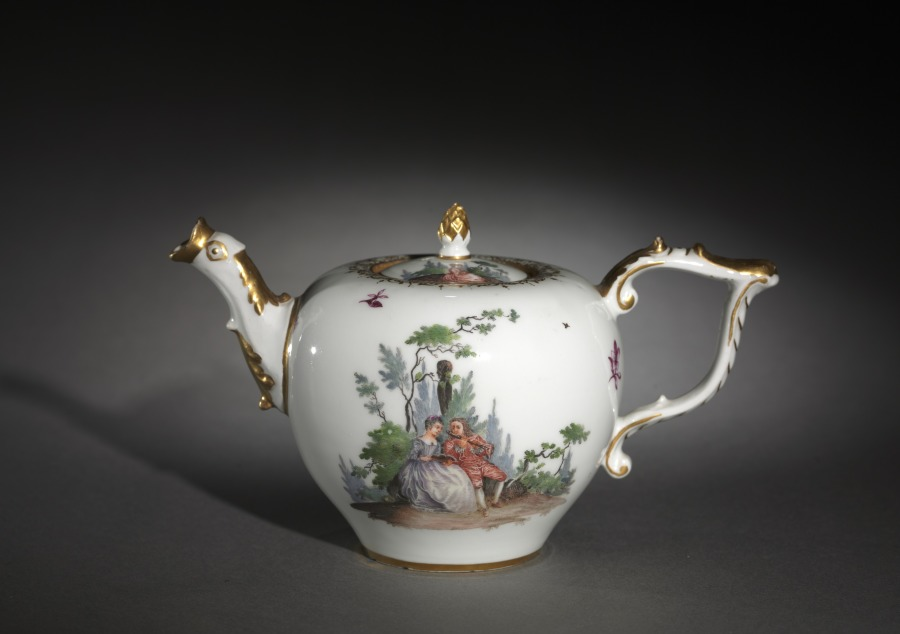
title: Teapot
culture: Germany, Meissen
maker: Meissen Porcelain Factory (German, est. c. 1710)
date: c. 1750–70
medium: porcelain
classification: Ceramic